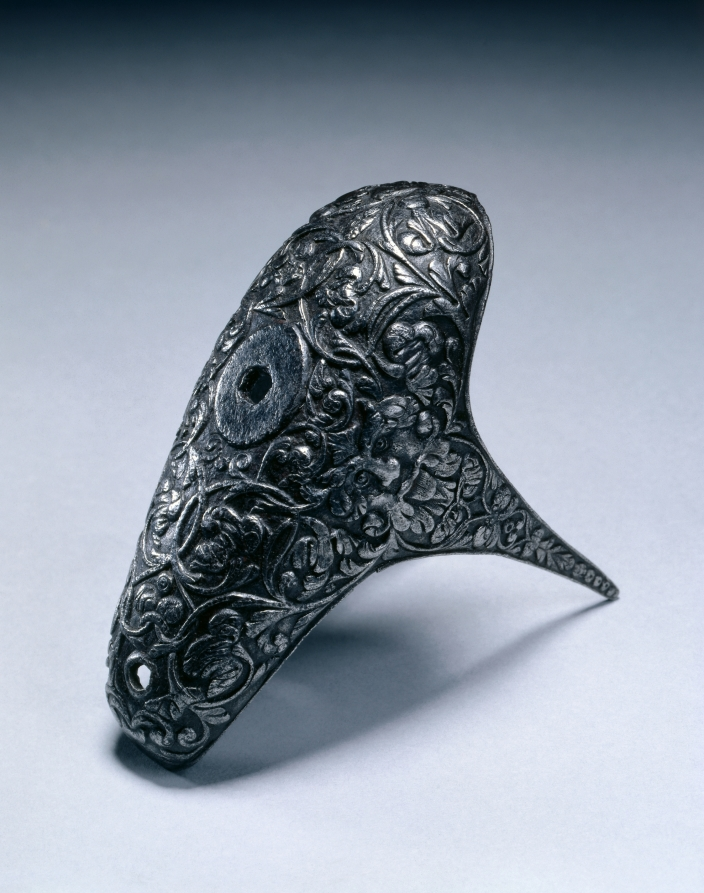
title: Butt-Cap from a Flintlock Pistol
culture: Italy, late 17th Century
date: c. 1690–1700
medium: steel, chiseled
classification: Arms and Armor